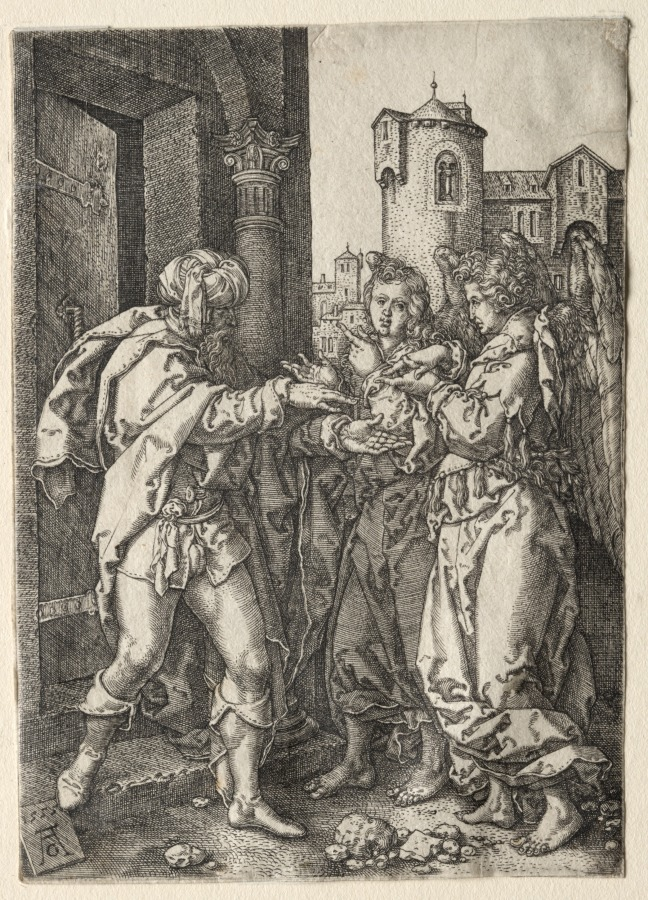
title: The Story of Lot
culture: Germany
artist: Heinrich Aldegrever (German, 1502–1555/61)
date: 1555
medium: engraving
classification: Print